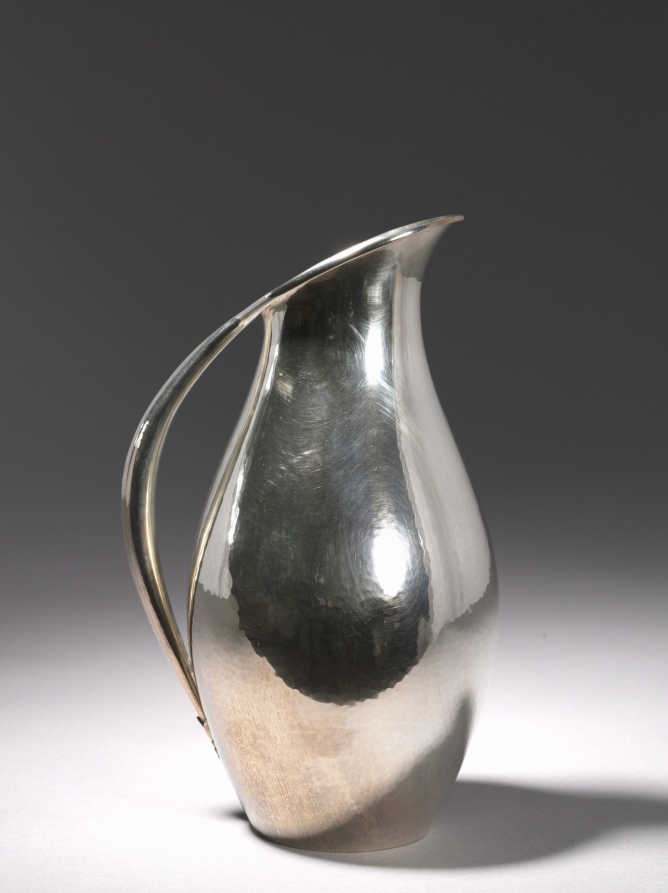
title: Water Pitcher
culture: Denmark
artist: Georg Jensen (Danish, 1866–1935)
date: c. 1950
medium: silver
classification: Silver